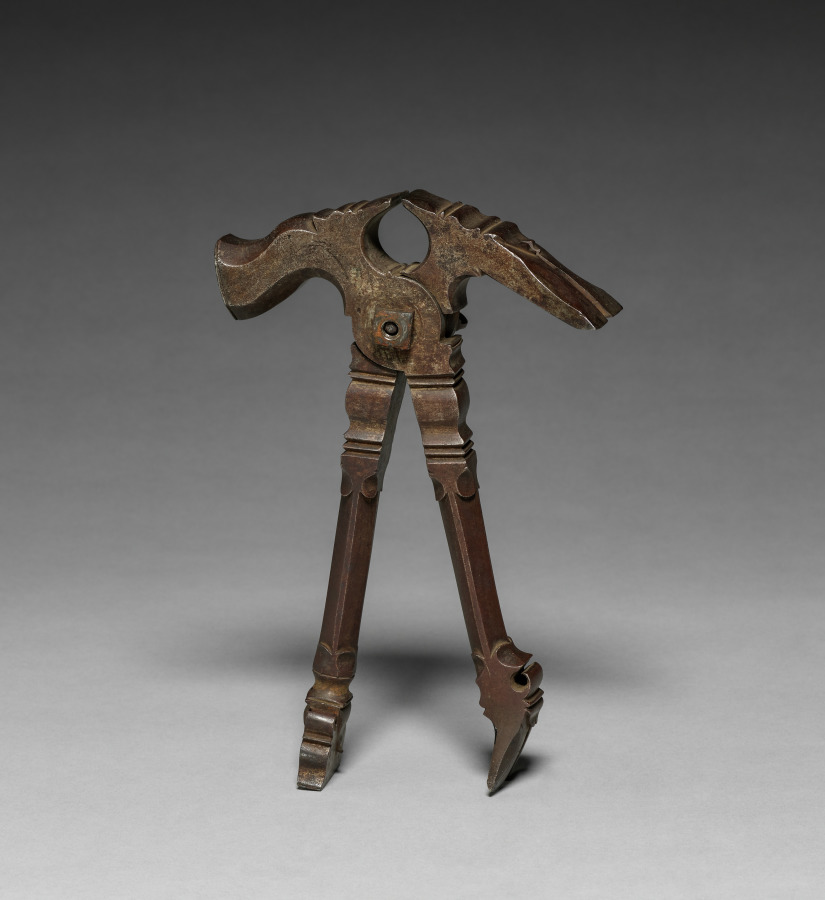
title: Combination Tool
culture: Germany or France, 16th century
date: 1500s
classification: Tool